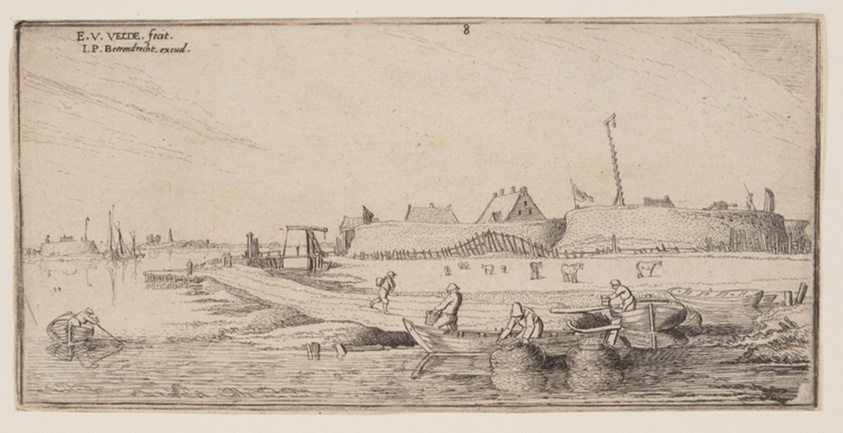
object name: Print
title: Fishermen in Rowboats Before a Walled Town, from Landscapes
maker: Esaias van de Velde; Dutch, 1587–1630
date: c. 1610-1630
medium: Etching on ivory laid paper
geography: Netherlands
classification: etching; paper; print; prints and drawing